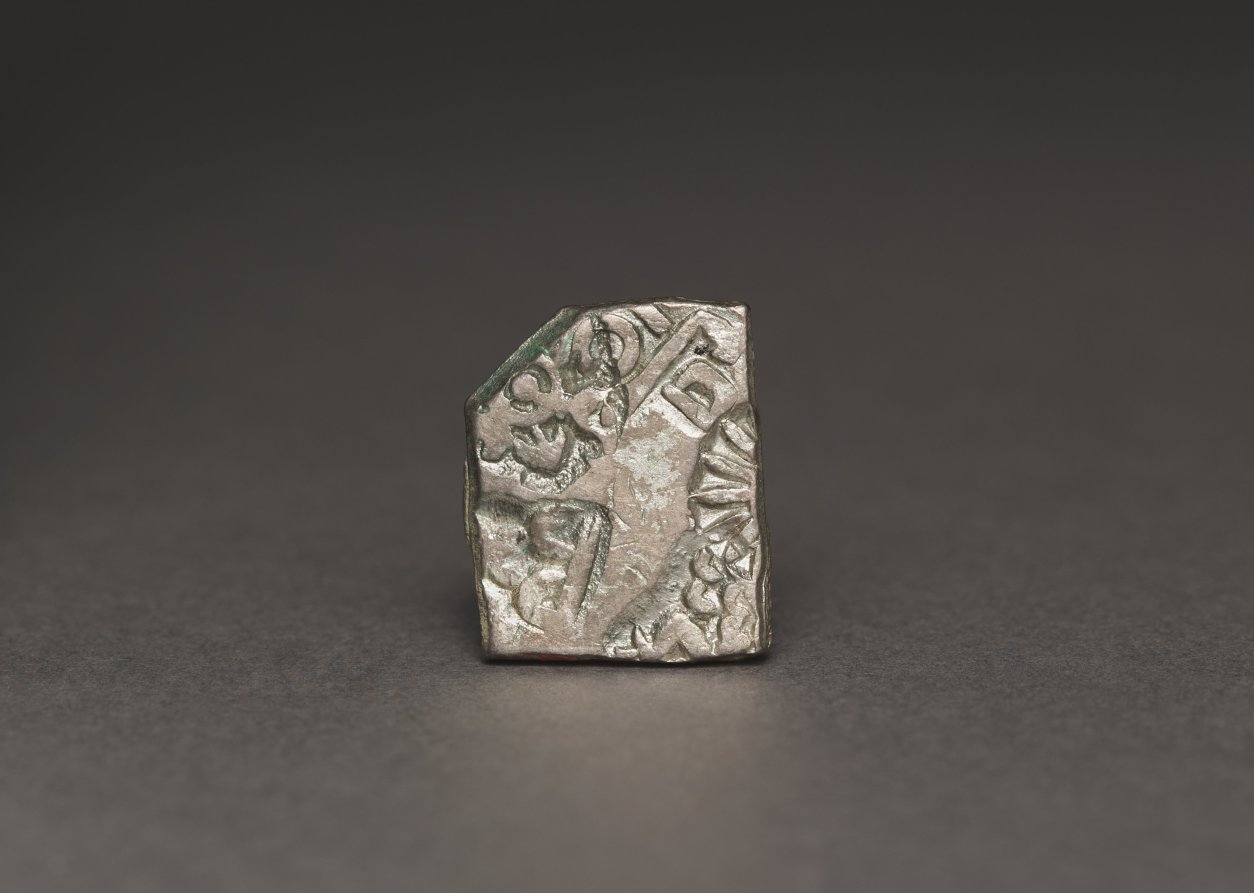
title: Punch-Marked Coin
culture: India, Rajasthan, Maurya period (322–185 BCE)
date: 400–300 BCE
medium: silver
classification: Coins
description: After Alexander of Macedon succeeded in conquering Egypt and Persia in 331 BC, his ambition to rule the known world led him further east across Bactria in Afghanistan, through the Hindu Kush mountain pass, and into India. There he succeeded in defeating all the local kings of the region until his men, on the brink of mutiny, insisted that they return to Greece. Alexander left governors in charge of his territories, and after his death in 323 BC, his governors became independent kings, establishing Hellenistic cities and a Greek cultural base in the region, which lasted for almost 200 years. Native Indian coinage was marked with symbols associated with the place where they were issued.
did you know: Early Indian coins were cut in irregular shapes and punched with a wide range of marks. The deep punches would prove that the coin was pure silver all the way through.